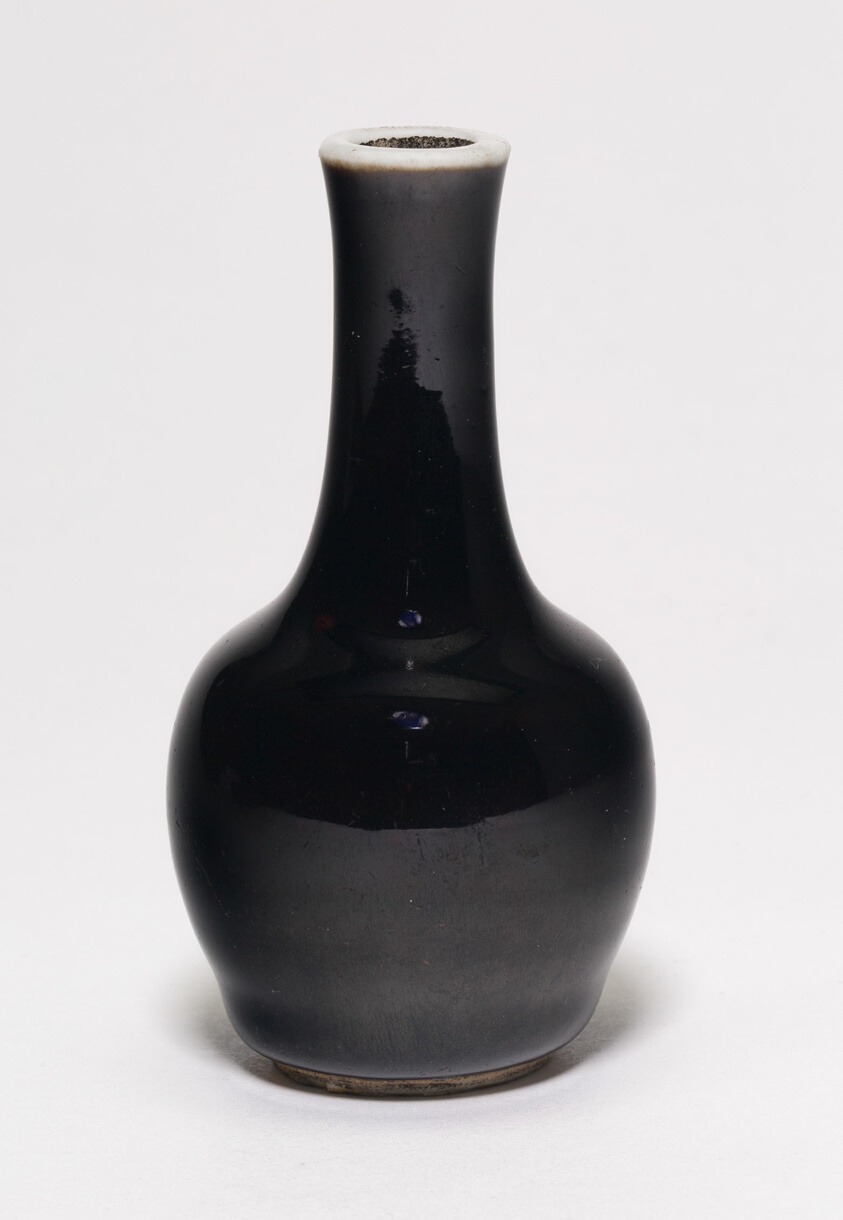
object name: Vessel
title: Miniature Bottle-Shaped Vase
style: Chinese (culture or style)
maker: China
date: Qing dynasty (1644–1911) or later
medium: Porcelain with mirror black glaze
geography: China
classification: vase; porcelain; vessel; asian art; ceramics